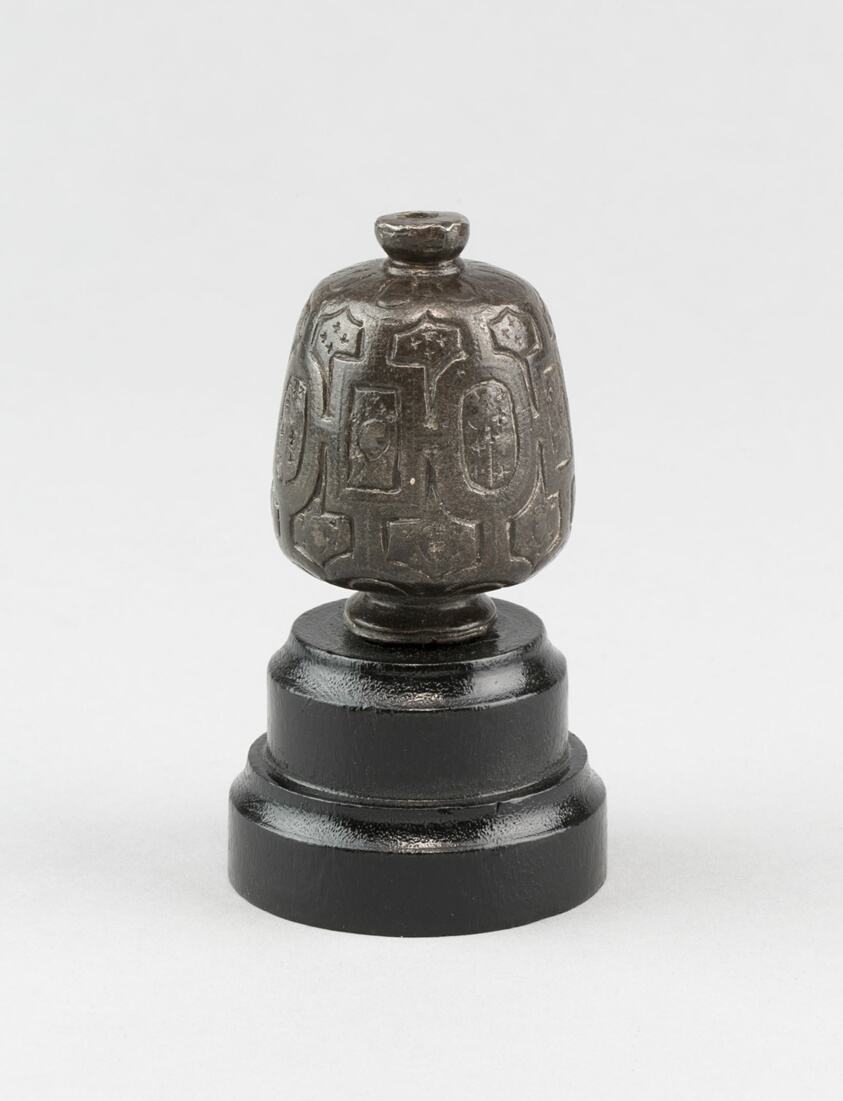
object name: Arms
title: Sword Pommel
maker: European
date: late 16th century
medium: Iron and silver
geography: Europe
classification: edged weapon-sword; arms; arms and armor